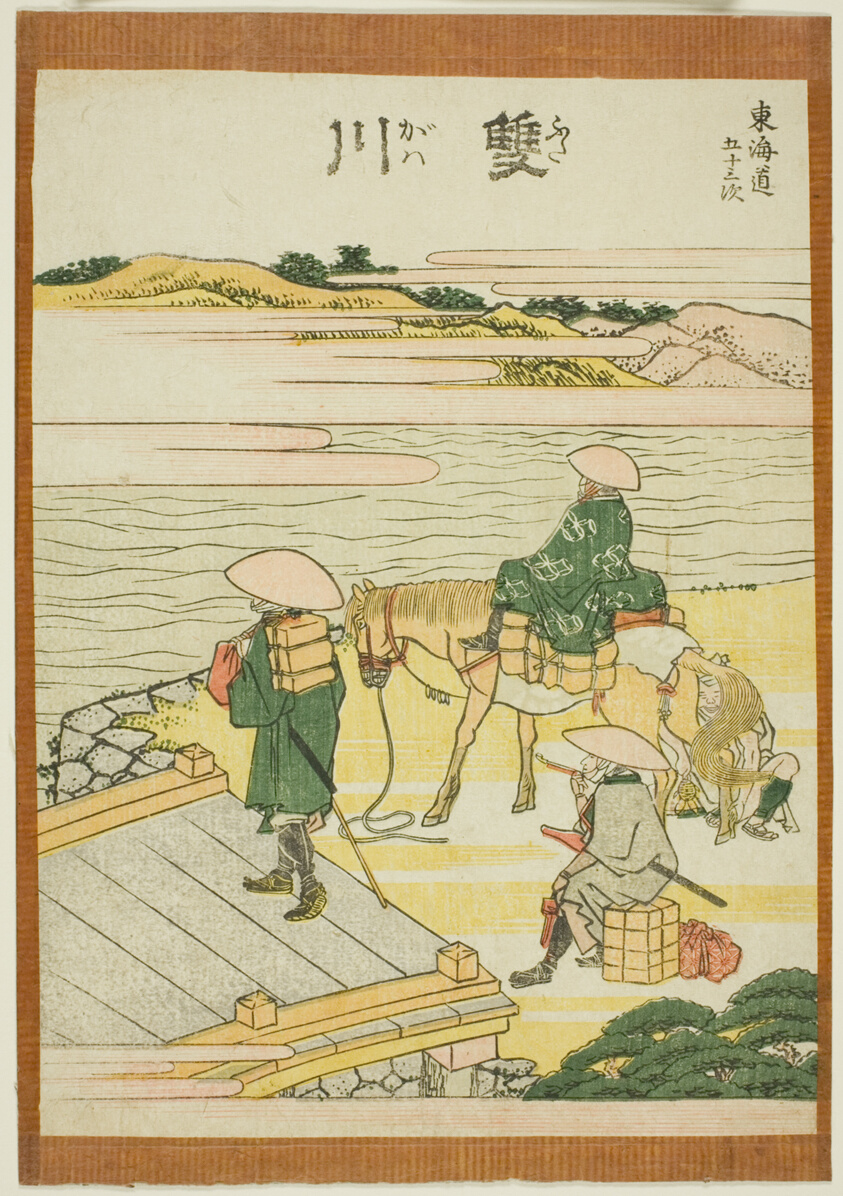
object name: Print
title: Futagawa, from the series "Fifty-three Stations of the Tokaido (Tokaido gojusan tsugi)"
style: Japanese (culture or style)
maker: Katsushika Hokusai 葛飾 北斎; Japanese, 1760-1849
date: c. 1806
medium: Color woodblock print; chuban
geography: Japan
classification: woodblock print; print; asian art